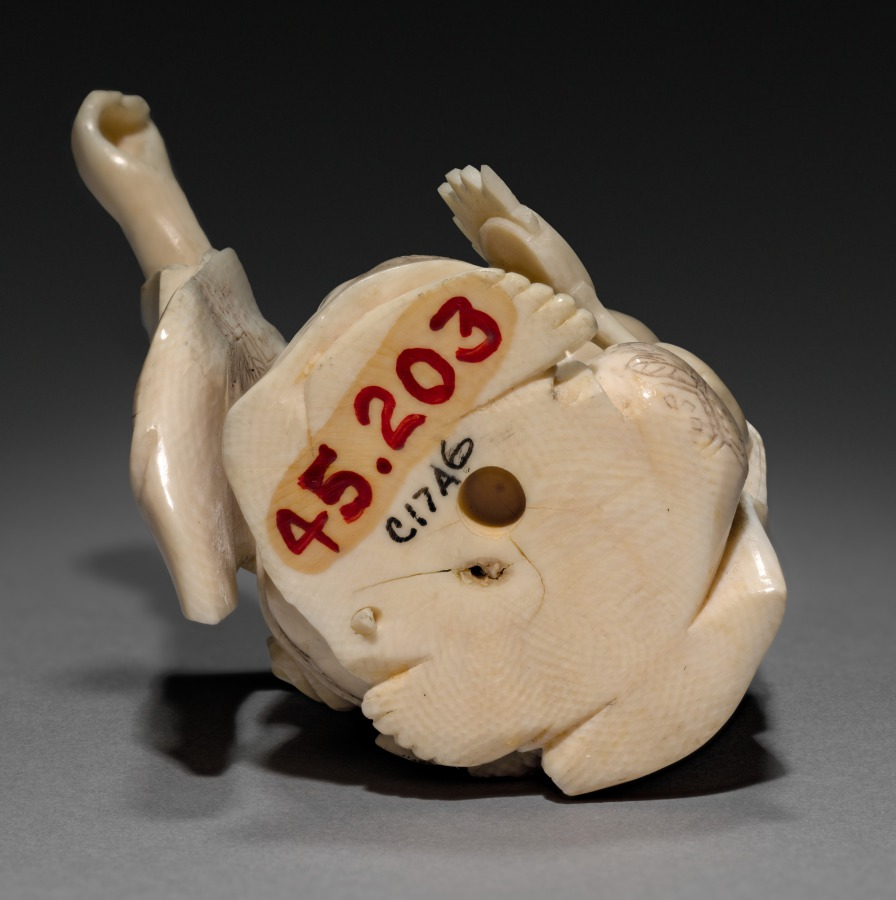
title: Kneeling Boy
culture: Japan, Meiji period (1868–1912)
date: early 1900s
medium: ivory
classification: Ivory